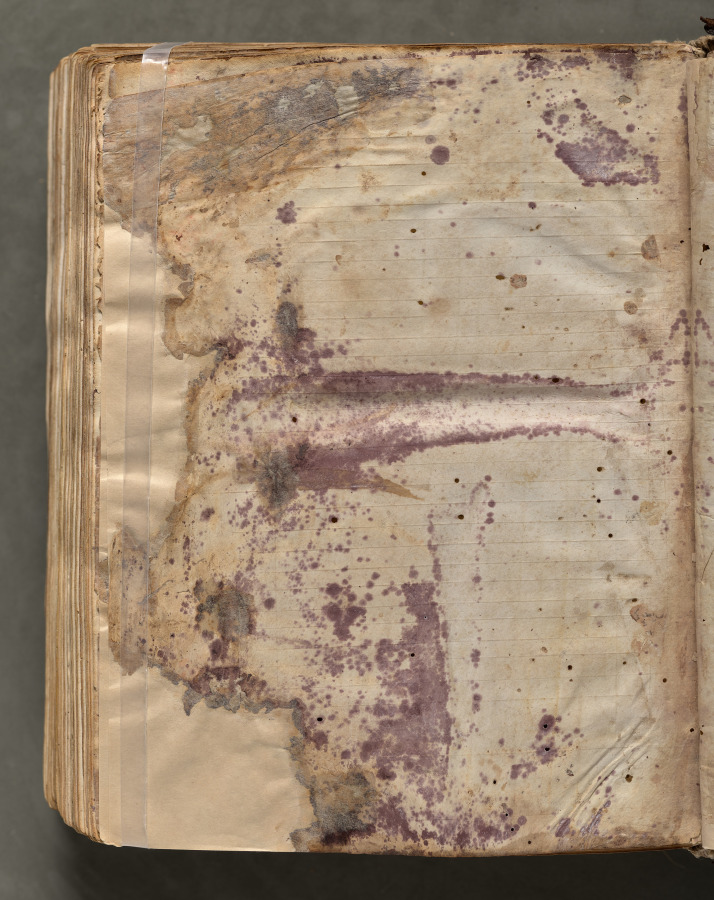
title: Text, folio 426 (verso), from a Gospel Book with Commentaries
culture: Byzantium, Constantinople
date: c. 1000–1100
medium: ink, tempera, and gold on vellum; leather binding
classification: Bound Volume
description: Each of the four gospels in this book opens on a page with brilliantly illuminated borders depicting the author of the text as well as birds—principally peacocks, symbols of the immortality of the soul—and fountains, representing the fountain of life and the salvation of the soul. This volume consists of 428 leaves with texts in Greek. Its level of sophistication suggests that it was probably written and decorated in a monastery in Constantinople.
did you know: Gospel books were carried in procession through Byzantine churches.